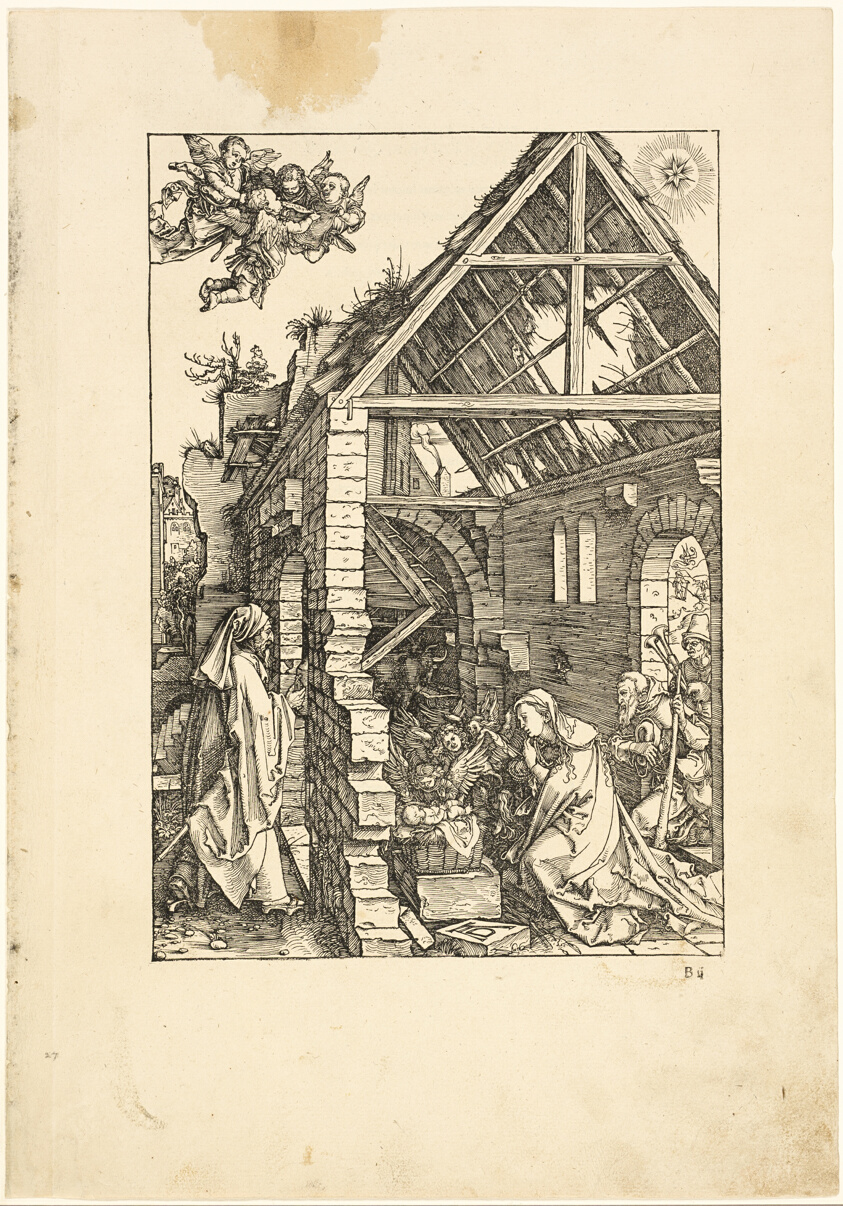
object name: Print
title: The Adoration of the Shepherds, from The Life of the Virgin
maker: Albrecht Dürer (German, 1471-1528)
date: c. 1503, published 1511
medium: Woodcut in black on tan laid paper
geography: Germany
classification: woodcut; print; prints and drawing; paper